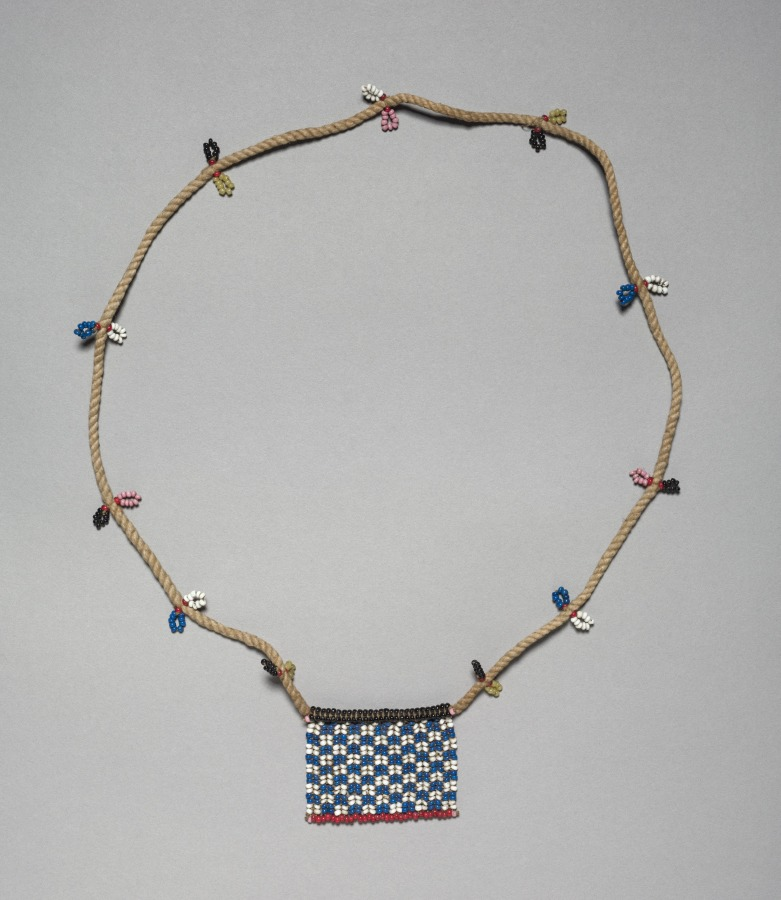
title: Beaded Necklace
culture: Africa, probably Southern Africa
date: early 1900s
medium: Glass beads and cord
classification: Jewelry